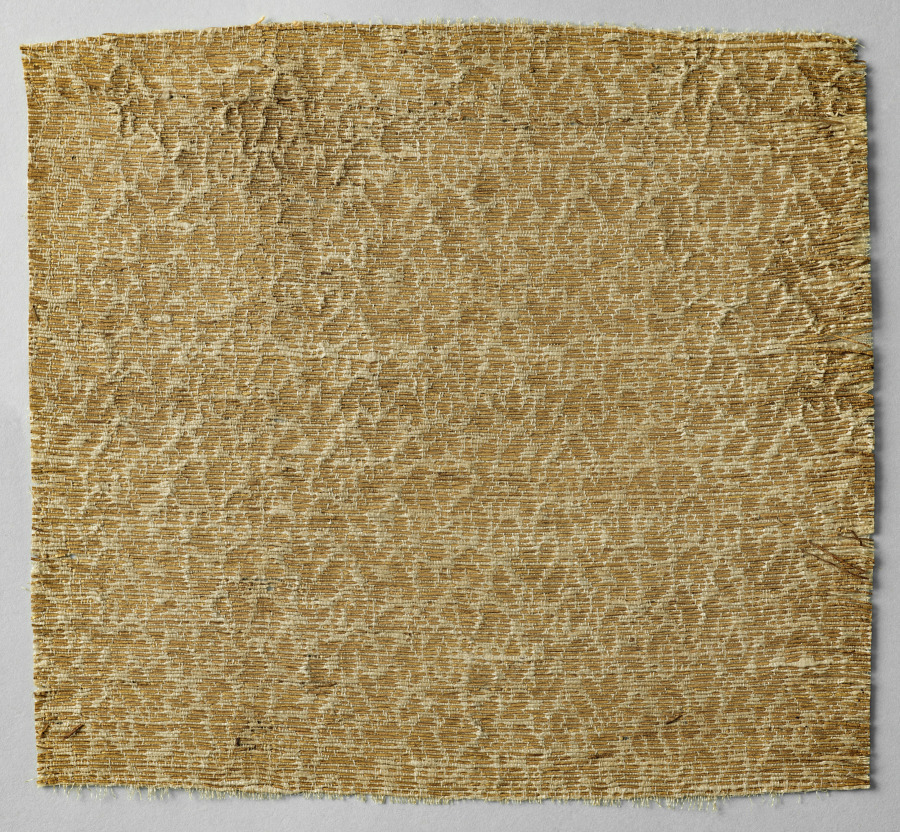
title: Textile with Tiny Leaves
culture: Central Asia, Il-khanid (Mongol) period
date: 1275–1350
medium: Silk and gold thread; tabby with supplementary weft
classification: Textile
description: The shimmering gold of the tiny scattered leaves in this silk perfectly suited the taste of the Mongol court. Showing no Chinese or eastern Iranian influence, this type of pattern appears to have been indigenous to eastern Central Asia. The closest parallels to the tiny leaves densely strewn across the surface are found among the silk tapestries of the Uyghurs.